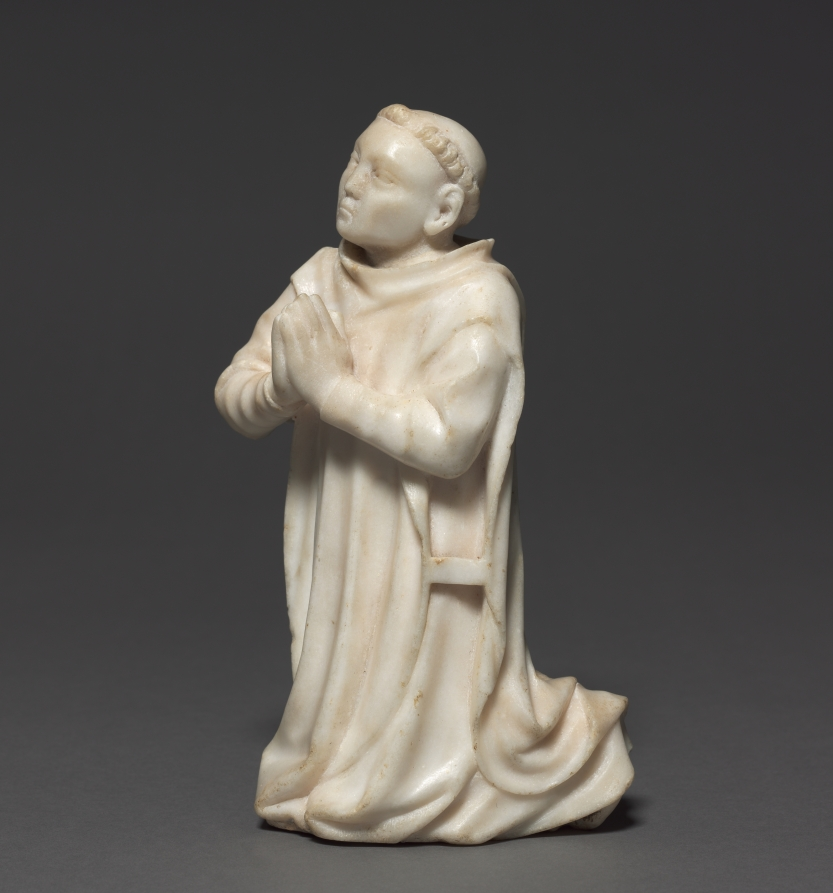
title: Kneeling Carthusian Monk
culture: France, Burgundy, Dijon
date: c. 1380–1400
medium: marble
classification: Sculpture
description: These are the only known surviving sculpted examples of kneeling Carthusian monks. These two figures would have formed part of a private devotional group, probably in a monk’s cell, with a sculpture of the crucified Christ or the Virgin positioned between them. They wear the recognizable white scapular, a hooded garment with front and back panels tied together with a tab.